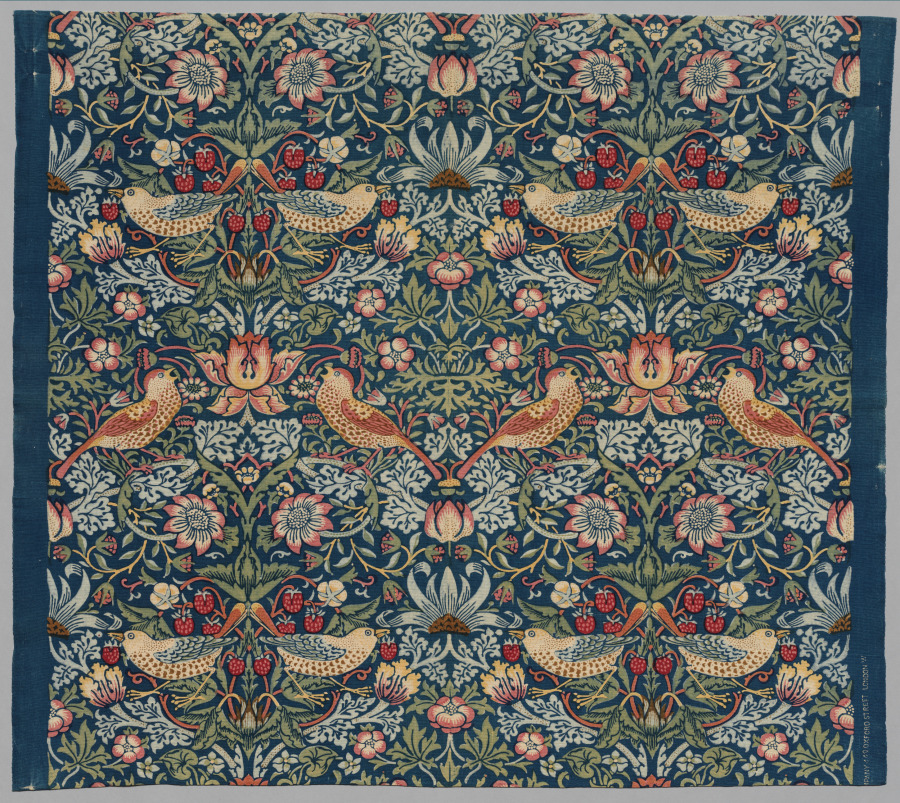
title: Strawberry Thief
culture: England, Merton Abbey, 20th century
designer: William Morris (British, 1834–1896)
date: c 1936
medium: plain weave cotton, discharge printed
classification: Textile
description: Perhaps the most recognizable of Morris’s textiles, Strawberry Thief celebrates the thrushes in Kelmscott Manor’s garden. May Morris remarked, “You can picture my Father going out in the early morning and watching the rascally thrushes at work on the fruit beds and telling the gardener who growls, ‘I’d like to wring their necks!’ that no bird in the garden must be touched.” With Strawberry Thief, Morris perfected the indigo-discharge process, which required the entire cloth to be dyed blue before it was bleached and block printed, in this case with more colors than any of his other textiles.